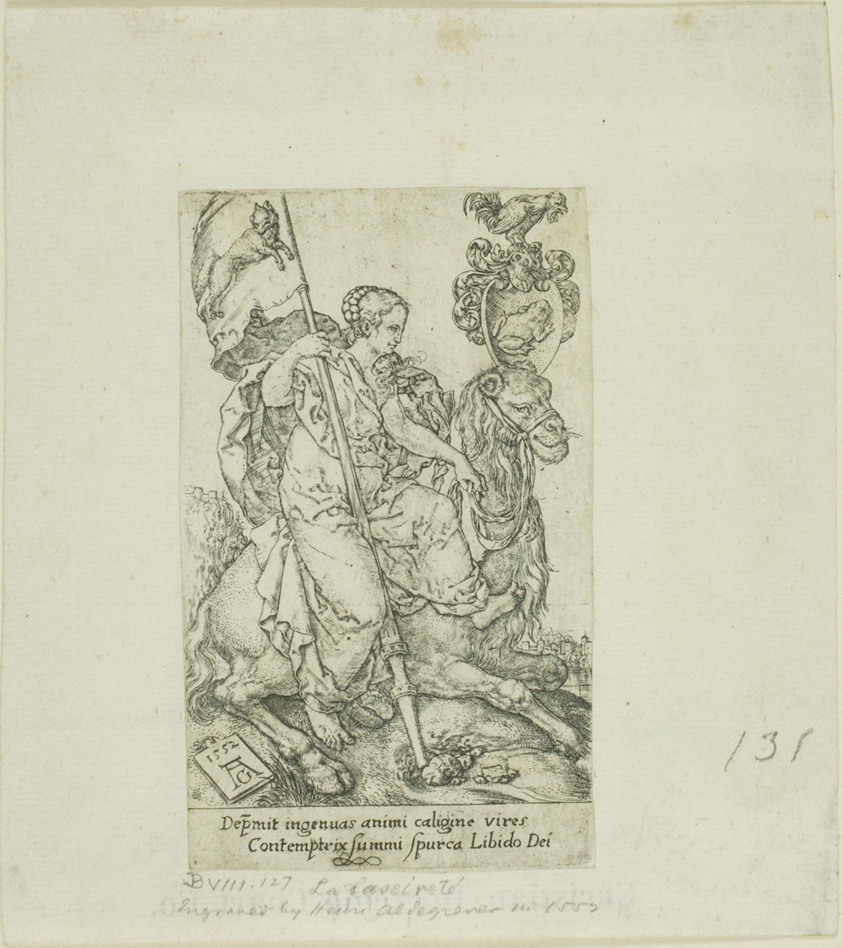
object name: Print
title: Lust, from Virtues and Vices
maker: Heinrich Aldegrever (German, 1502-c.1560)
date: 1552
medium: Engraving in black on cream paper laid down on ivory laid paper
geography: Germany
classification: engraving; print; prints and drawing